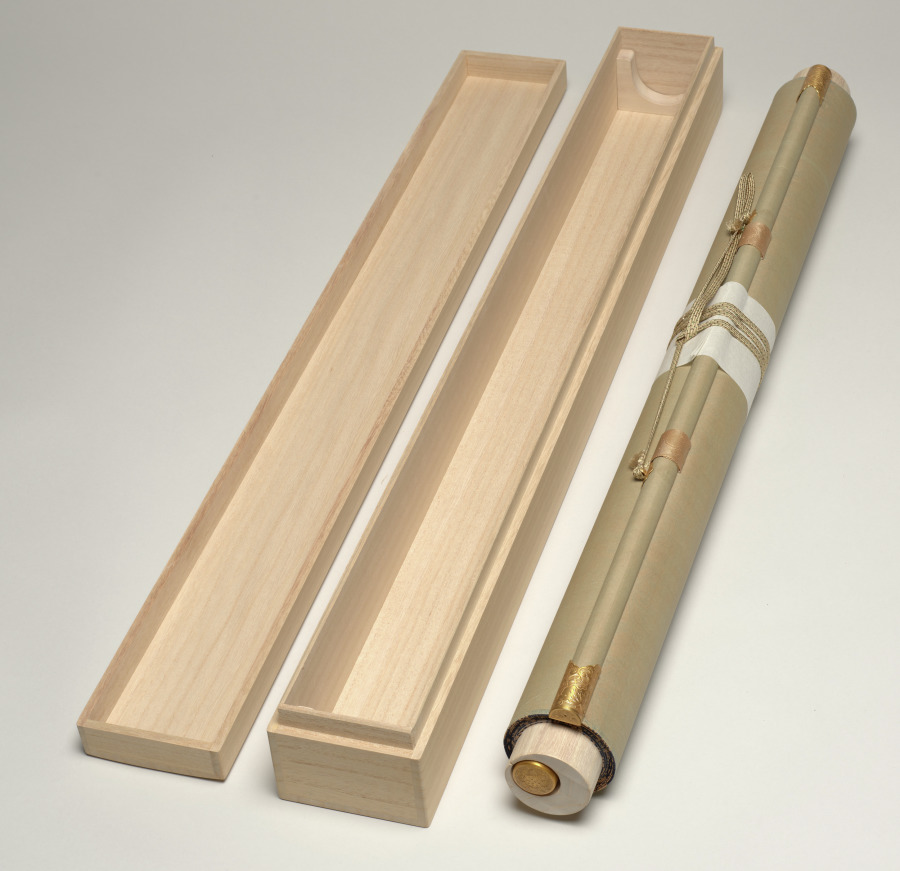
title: Shakyamuni with the Sixteen Benevolent Deities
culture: Japan, Nanbokuchō period (1336–92)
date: mid- to late 1300s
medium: Hanging scroll; ink, color, gold and cut gold on silk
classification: Painting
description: The historical Buddha Shakyamuni forms a triad with the bodhisattvas Fugen and Monju. Sixteen deities who protect the Buddhist scripture called the Great Perfection of Wisdom Sutra surround them. At the bottom left stands the Chinese monk Xuanzang, noted as a Buddhist scholar and translator of religious texts from India, including the Great Wisdom Sutra.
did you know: This painting would have been the main icon for ceremonial readings of the Great Perfection of Wisdom Sutra.